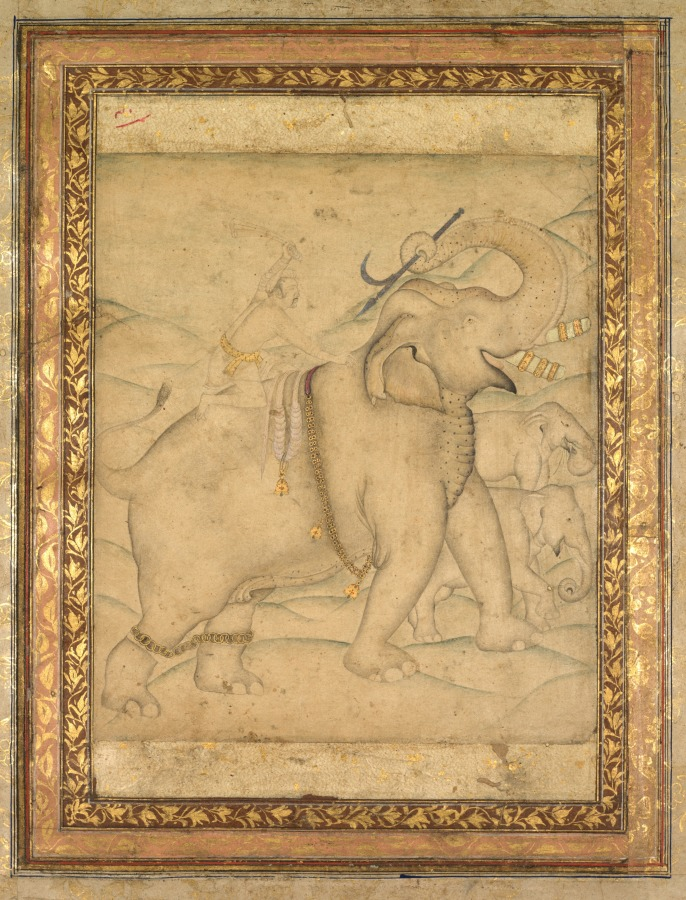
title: Portrait of Emperor Jahangir Riding an Elephant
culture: India, Mughal Dynasty (1526-1756)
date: 1700–1750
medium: drawing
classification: Painting